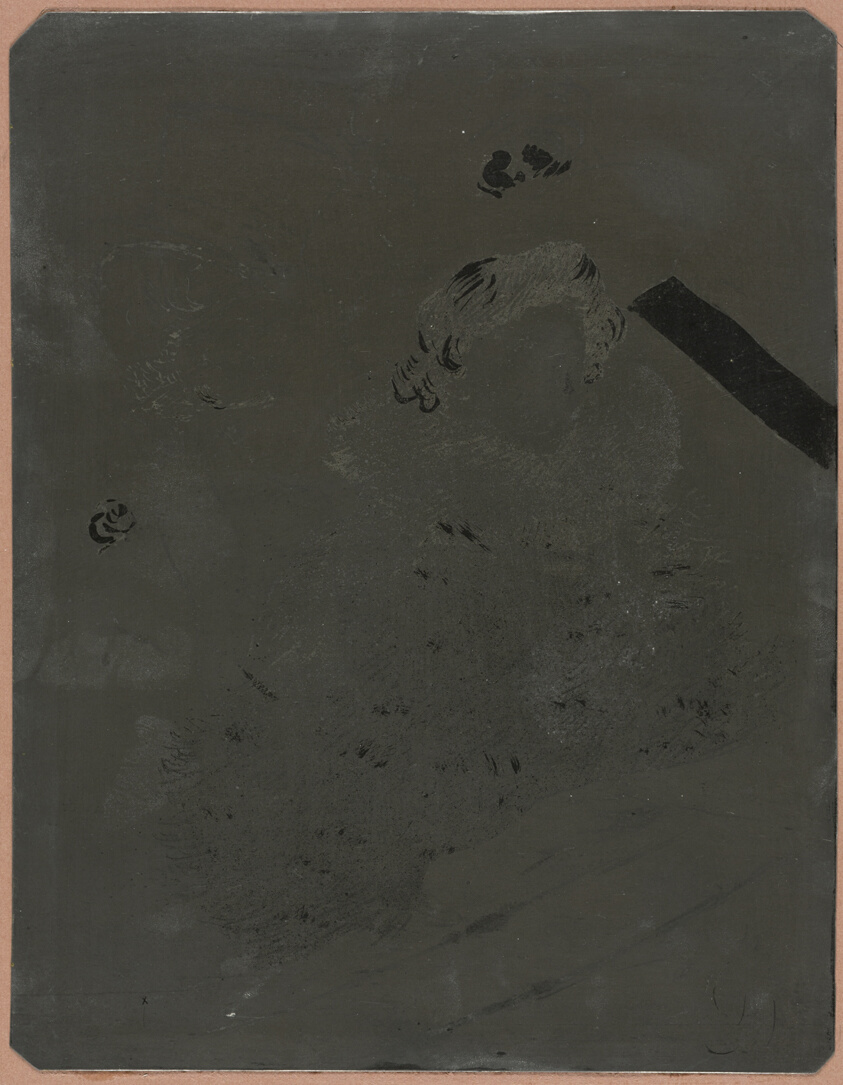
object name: Print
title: At the Concert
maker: Henri de Toulouse-Lautrec (French, 1864-1901)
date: 1896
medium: Zinc lithographic plate with corners removed and beveled edges, laid down on mauve board and taped to mat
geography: France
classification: zincograph; matrix; prints and drawing; print